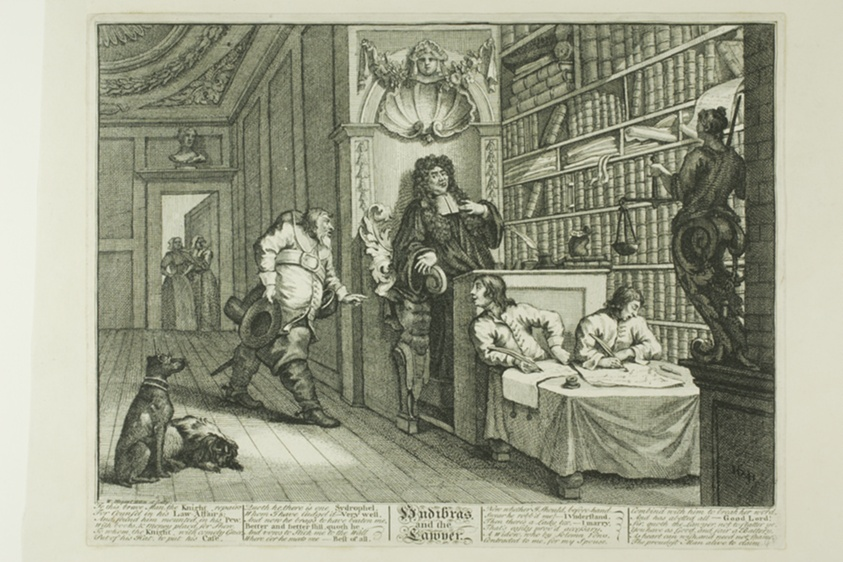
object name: Print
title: Hudibras and the Lawyer, plate twelve from Hudibras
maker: William Hogarth (English, 1697-1764)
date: February 1725/26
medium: Etching and engraving in black on cream paper edge, mounted on cream wove paper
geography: England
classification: engraving; prints and drawing; print; etching